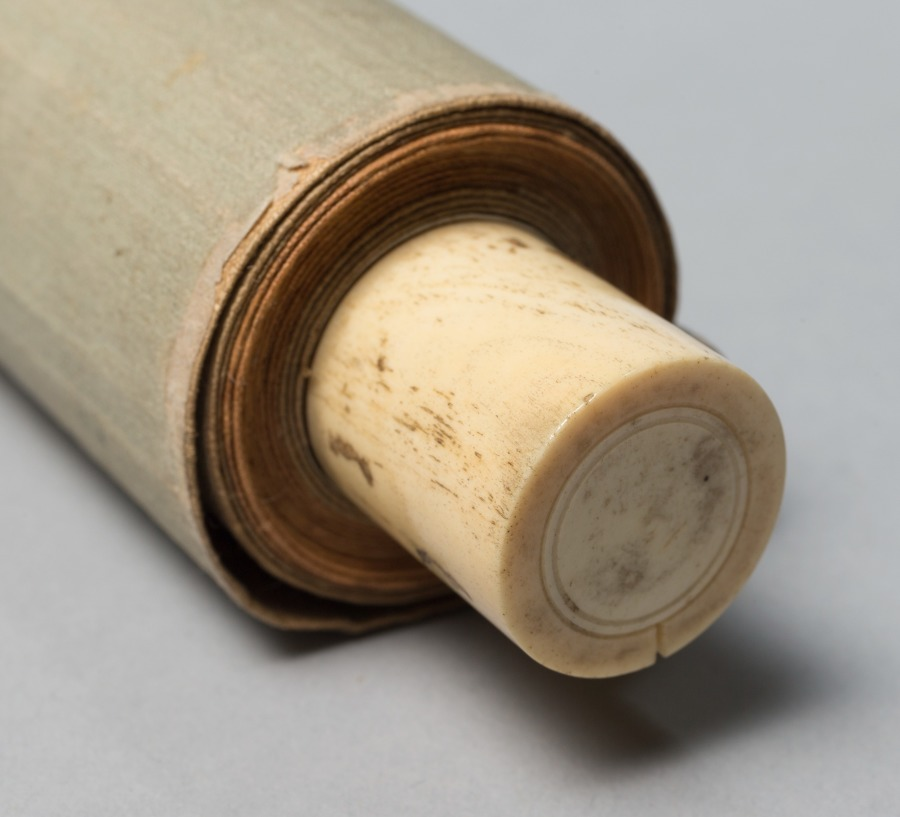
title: White-Robed Guanyin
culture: China, Yuan dynasty (1271-1368)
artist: copy after Jueji Yongzhong (Chinese, active around 1300)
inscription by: Zhongfeng Mingben (Chinese, 1263–1323)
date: late 1200s–early 1300s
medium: hanging scroll; ink and gold on silk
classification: Painting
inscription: Inscription: one of the 84,000 painted by the priest Insei.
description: The original model for this ink drawing of Guanyin, the bodhisattva of infinite compassion (Avalokiteshvara in Sanskrit), is CMA 1978.47.1. This drawing is a later copy with the same image of the White-Robed Guanyin, but in reverse. The inscription above reads: one of the 84,000 painted by the priest Insei. The inscription seems to indicate that the Japanese priest Insei repeatedly copied the image of the bodhisattva in an act of piety and to accumulate merit, as is promised in the Lotus Sutra for anyone who paints images of the Buddha, they “will achieve the Buddha path.” The priest’s name and seal need further study and identification.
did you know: The bodhisattva's face and halo were delicately painted in gold.